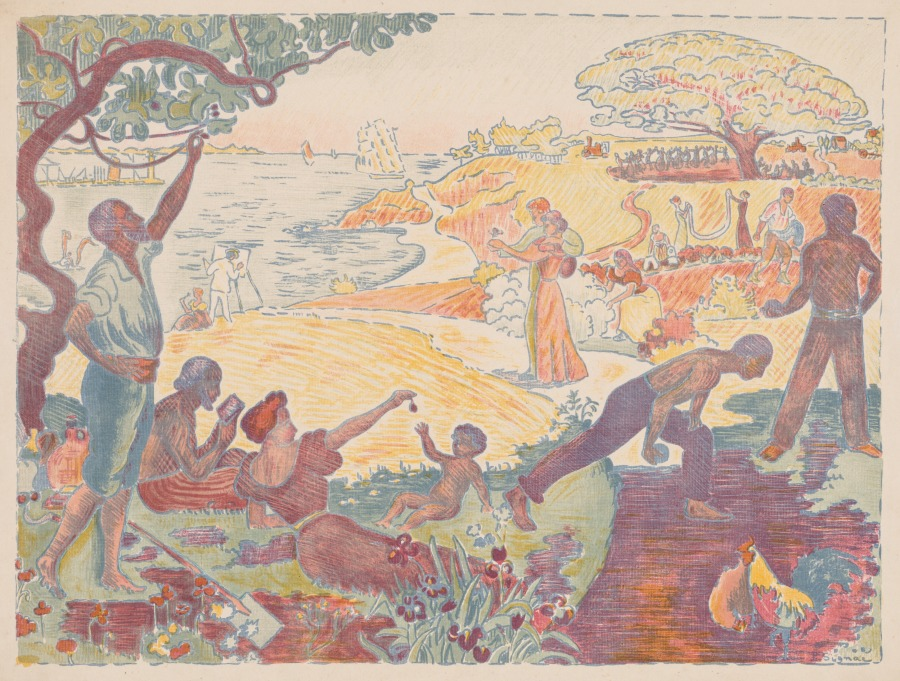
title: Harmonious Times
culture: France, late 19th Century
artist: Paul Signac (French, 1863–1935)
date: 1895–1896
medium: color lithograph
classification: Print